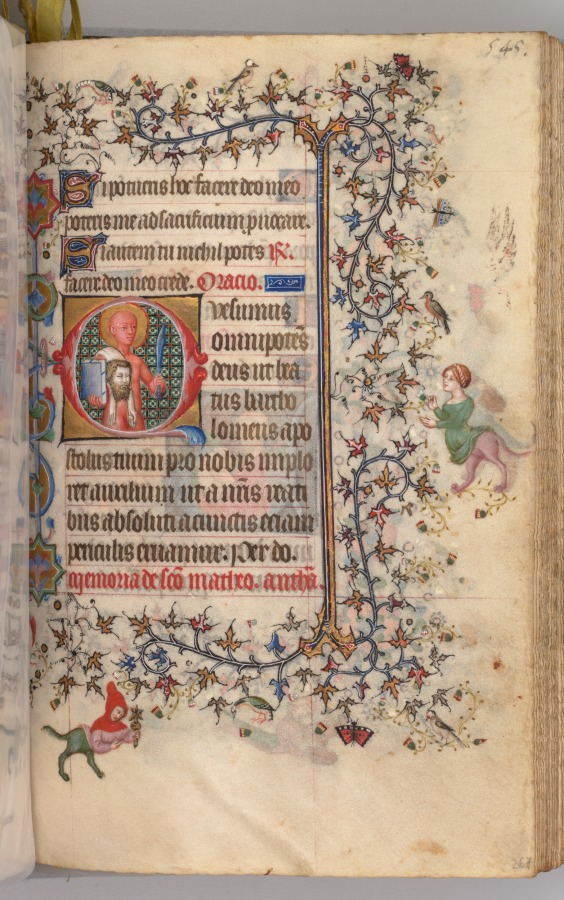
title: Hours of Charles the Noble, King of Navarre (1361-1425): fol. 267r, St. Bartholomew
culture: France, Paris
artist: Master of the Brussels Initials and Associates (French)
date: c. 1405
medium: ink, tempera, and gold on vellum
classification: Bound Volume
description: This precious volume was obviously highly prized by its owner, the French-born King of Navarre, who had his coat of arms painted on no less than twenty folios. Rather than directly commissioning this manuscript from a specific workshop, it seems that Charles the Noble acquired his book of hours -- perhaps ready-made for the luxury market -- while on a trip to Paris in 1404-05. A collaborative effort, six painting styles are evidenced within the pages of this codex, those of two Italians, two Frenchmen, and two Netherlanders. The painter who was responsible for the planning and decoration of the book, and who produced seventeen of the large miniatures, was a Bolognese artist known as the Master of the Brussels Initials. His principal assistant, responsible for most of the borders, was a Florentine who signed his name "Zecho" da Firenze on folio 208 verso.